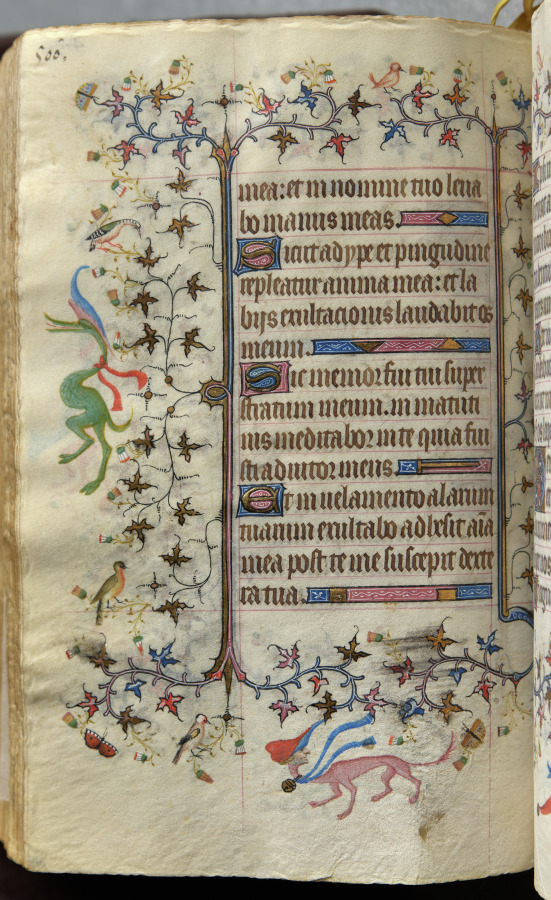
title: Hours of Charles the Noble, King of Navarre (1361-1425): fol. 244v, Text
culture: France, Paris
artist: Master of the Brussels Initials and Associates (French)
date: c. 1405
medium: ink, tempera, and gold on vellum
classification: Bound Volume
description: This precious volume was obviously highly prized by its owner, the French-born King of Navarre, who had his coat of arms painted on no less than twenty folios. Rather than directly commissioning this manuscript from a specific workshop, it seems that Charles the Noble acquired his book of hours -- perhaps ready-made for the luxury market -- while on a trip to Paris in 1404-05. A collaborative effort, six painting styles are evidenced within the pages of this codex, those of two Italians, two Frenchmen, and two Netherlanders. The painter who was responsible for the planning and decoration of the book, and who produced seventeen of the large miniatures, was a Bolognese artist known as the Master of the Brussels Initials. His principal assistant, responsible for most of the borders, was a Florentine who signed his name "Zecho" da Firenze on folio 208 verso.